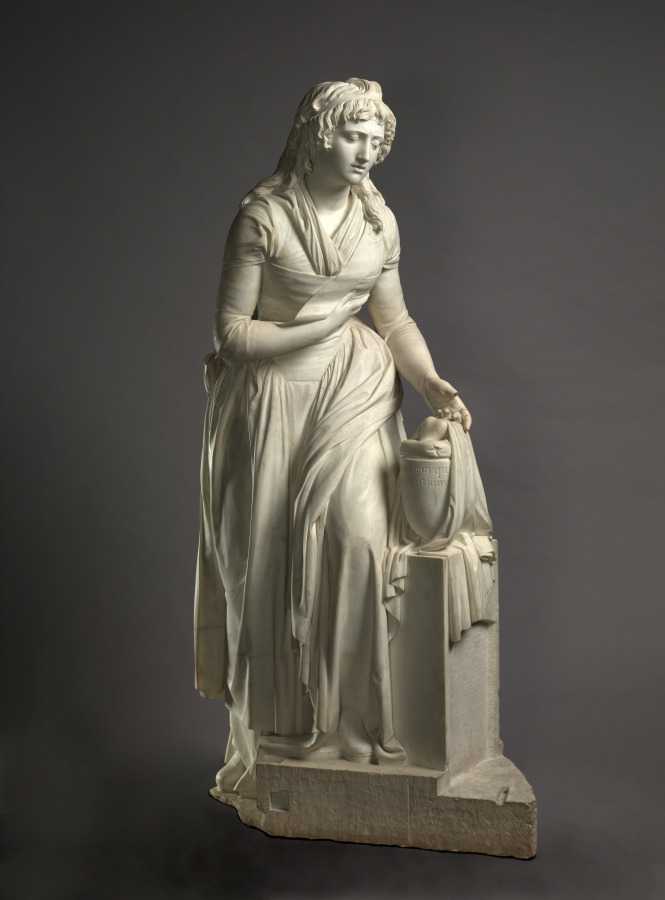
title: Funerary Monument for the Marquis de Tourney (for the Chapel of the Château de la Falaise)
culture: France, Paris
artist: François-Nicolas Delaistre (French, 1746–1832)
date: 1787–1793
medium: marble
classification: Sculpture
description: The Marquis Gallyot de Tourney commissioned this sculpture to serve as his funeral monument. It depicts a young woman gesturing with one hand toward an urn bearing the inscription Voilà ce coeur qui nous a tant aimé (Here is the heart that loved us so). The marquis specified that the figure should be a rosière, a virtuous woman of humble circumstances, a choice likely informed by the writings of Enlightenment philosophers, especially Jean-Jacques Rousseau, who championed greater social equality and democratic reform.